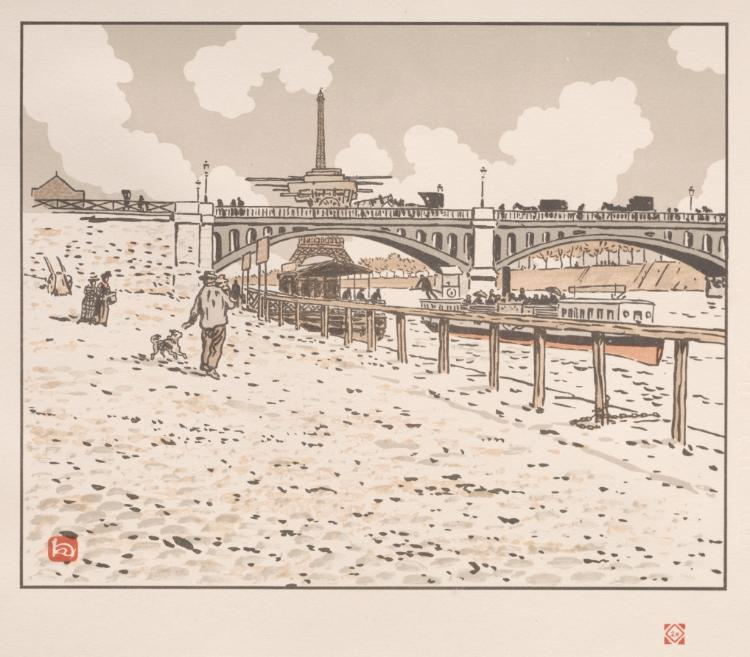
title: Thirty-Six Views of the Eiffel Tower: From the Grenelle Bridge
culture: France, early 20th century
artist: Henri Rivière (French, 1864–1951)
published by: Printed by Verneau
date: 1902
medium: color lithograph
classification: Print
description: As the center of Paris became an increasingly costly place to live, people with moderate incomes moved further out to places like Grenelle, on the southwest border of the city. Industry was also routed out of central Paris for aesthetic and sanitary reasons so that smokestacks were a common sight along the city’s perimeter. Grenelle was home to a number of metal-working industries, and in this scene the Eiffel Tower, close to the composition’s center, adopts the form of a factory smokestack. A white cloud at its tip suggests a puff of smoke.